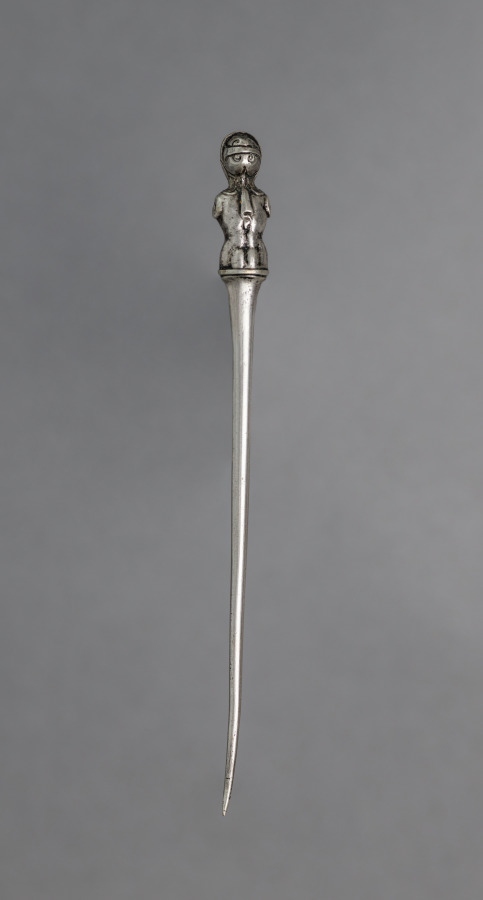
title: Pick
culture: Germany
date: 1500s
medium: silver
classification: Silver